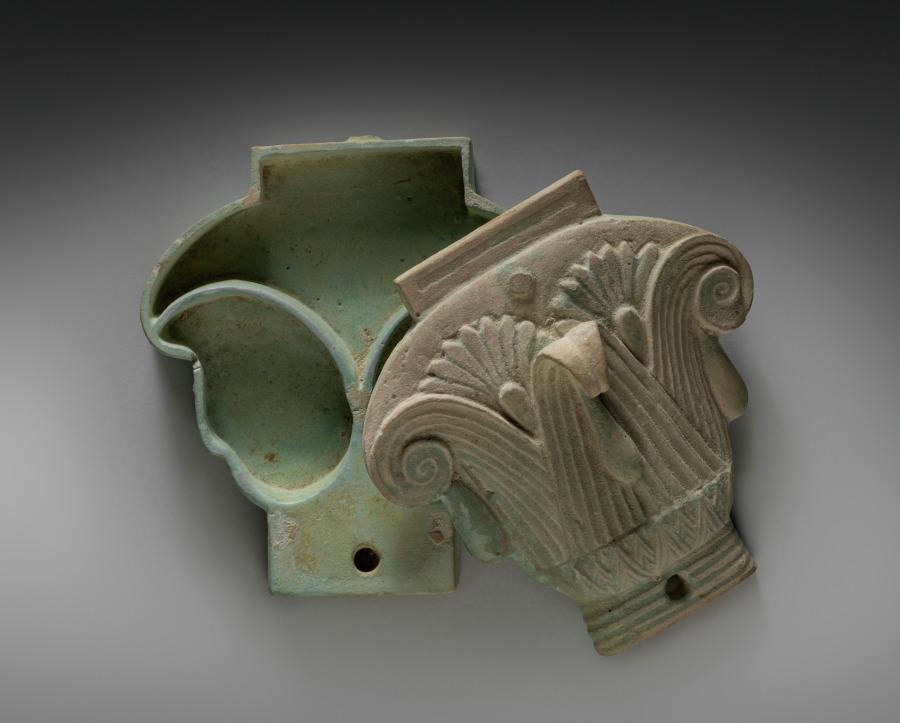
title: Box (Pyxis) in the Form of a Composite Capital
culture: Egypt, Greco-Roman period (332 BCE–395 CE), Ptolemaic dynasty (305–30 BCE)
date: 305–30 BCE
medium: pale robin's-egg blue faience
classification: Vessels